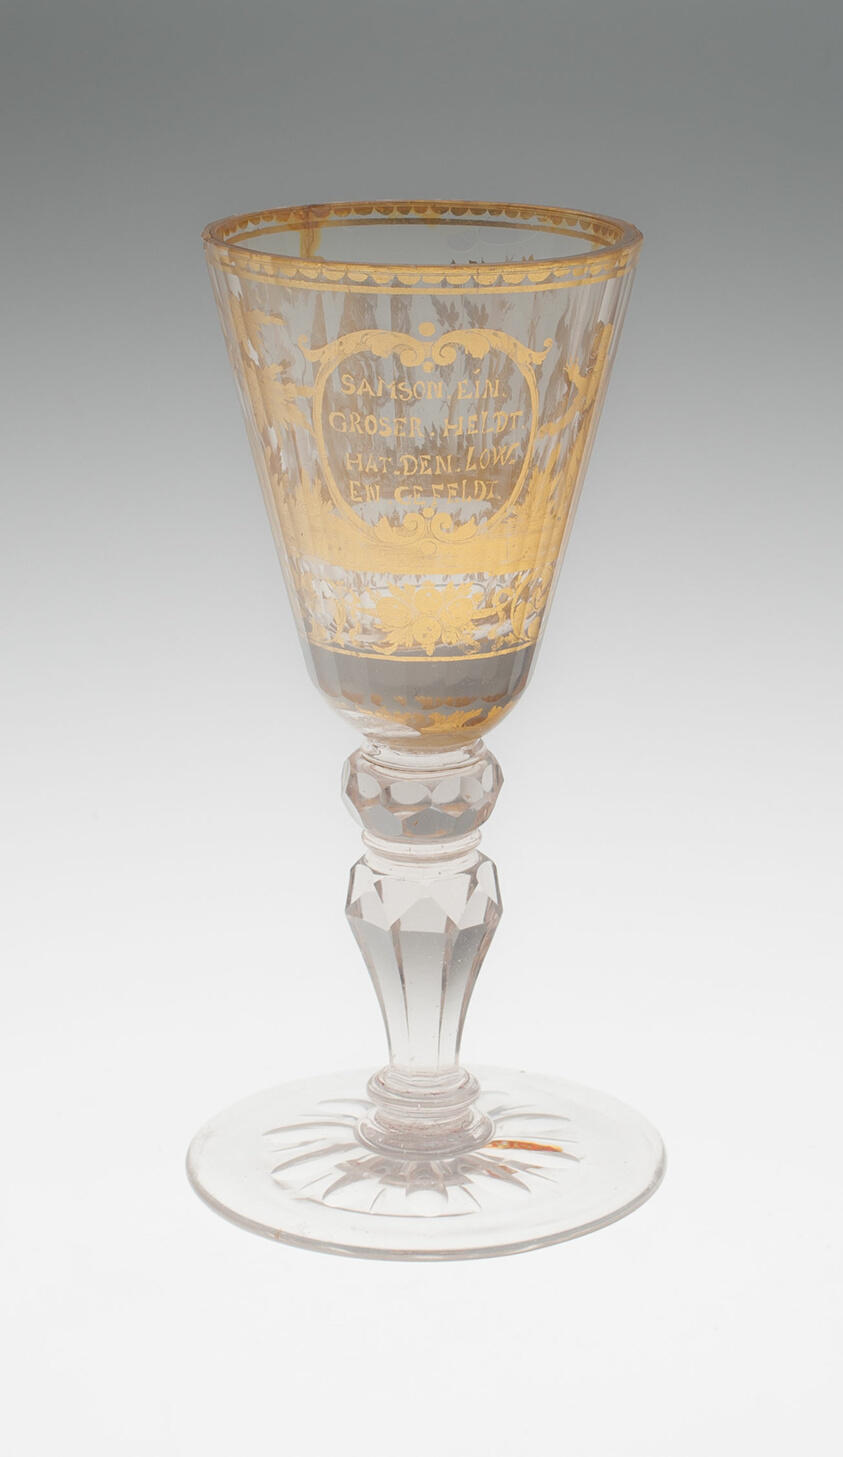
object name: Glass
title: Wine Glass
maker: Bohemia, Czech Republic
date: Early 18th century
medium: Glass with engraved gold leaf decoration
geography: Bohemia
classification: drinking vessel; glass; european decorative arts